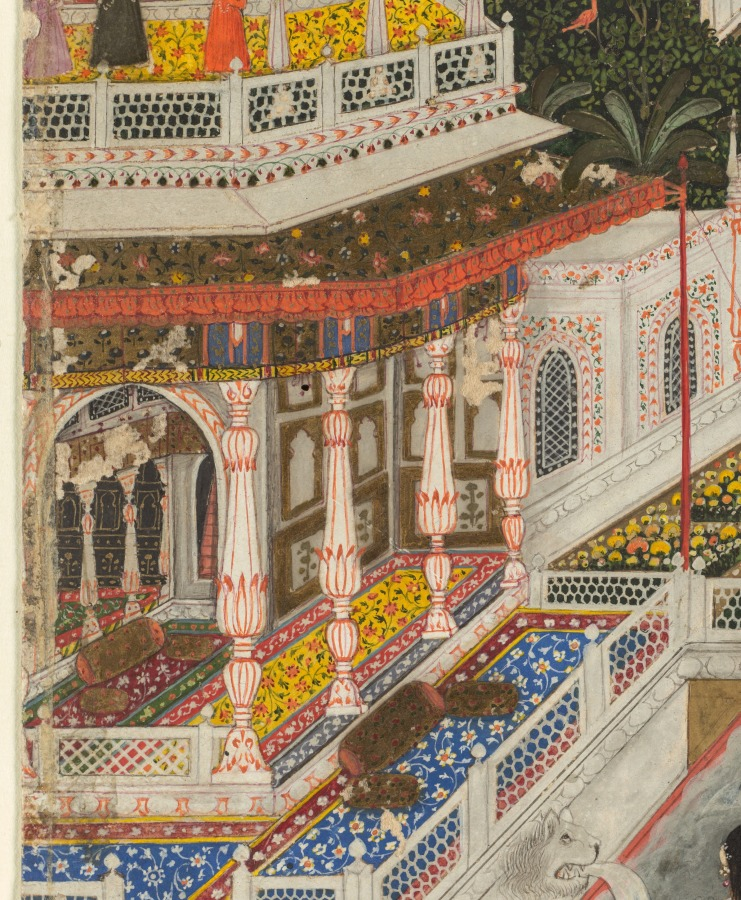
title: Women bathing before an architectural panorama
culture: India, Lucknow, Mughal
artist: Fayzullah (Indian, active c. 1730–1765)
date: c. 1765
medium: Gum tempera and gold on paper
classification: Painting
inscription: Persian inscription in center, on marble balustrade, in nasta‘liq script: The work of Fayzullah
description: Despite the wars waged and forts besieged in the background, life in the palace is carefree and luxurious. Some women enjoy hookahs and music on balconies, while others swim and drink liquor with abandon from Chinese porcelain cups and bottles. The artist has placed his name under the central pavilion, observing the scene across a formal garden of marigolds. The artist seems to have enjoyed experimenting with the idea of perspective, learned from European sources. He created a rapidly receding space that telescopes the view from the intimate harem quarters to the distant battlefields.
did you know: The artist signed his name below the king’s seat that overlooks the garden vista.